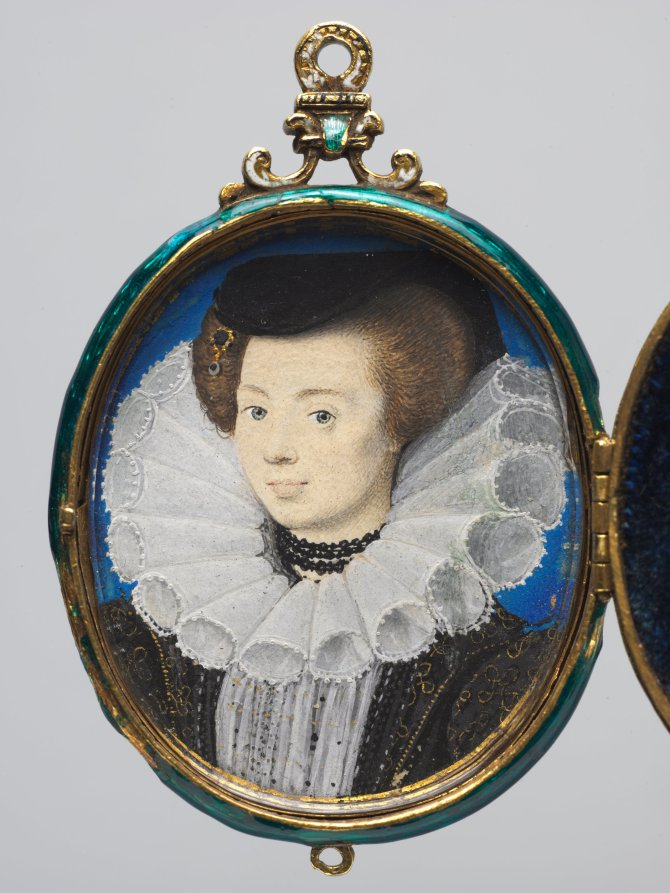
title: Portrait of a Woman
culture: England, 16th century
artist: Nicholas Hilliard (English, c. 1547–1619)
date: c. 1593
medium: watercolor on vellum in a gold and enamel locket frame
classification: Portrait Miniature